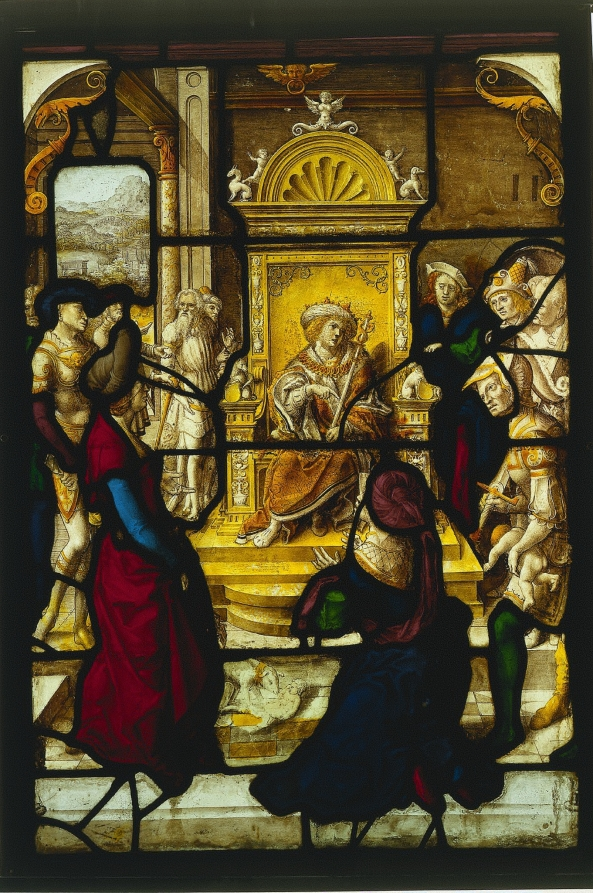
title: The Judgment of Solomon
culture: Netherlands, South Lowlands, 16th century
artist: Dirk Vellert (Netherlandish, 1480/85–1547)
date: c. 1530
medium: pot metal, white glass, and silver stain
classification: Glass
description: Though also a painter and printmaker, Dierick (or Dirk) Vellert is best known as a designer of stained glass. Active in Antwerp, where he became a master of the Guild of Saint Luke in 1511, Vellert richly ornamented his work with garlands, masks, vases, and other classically inspired motifs. A great deal of his glass was exported. As an engraver, his prints owe a good deal to Albrecht Dürer and Luca van Leyden. These two panels depict famous incidents from the Old Testament featuring the rendering of judgment. Both may have originally been made for a council chamber or a court of justice. Conceivably, because of their subjects, they could have served as models of justice for the magistrates who deliberated within view of them.